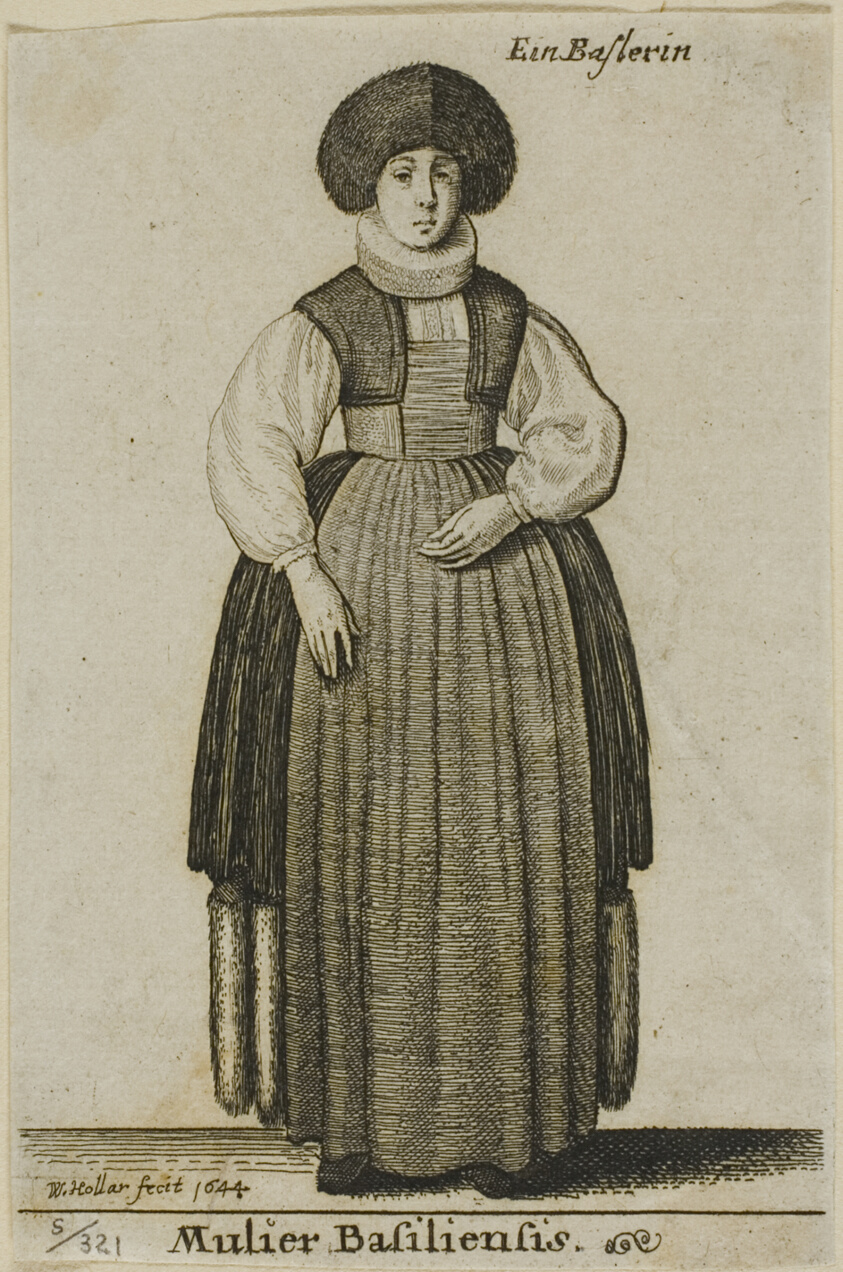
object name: Print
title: Woman of Basel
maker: Wenceslaus Hollar (Bohemian, 1607-1677)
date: 1644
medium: Etching on gray Asian paper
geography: Bohemia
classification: etching; print; prints and drawing